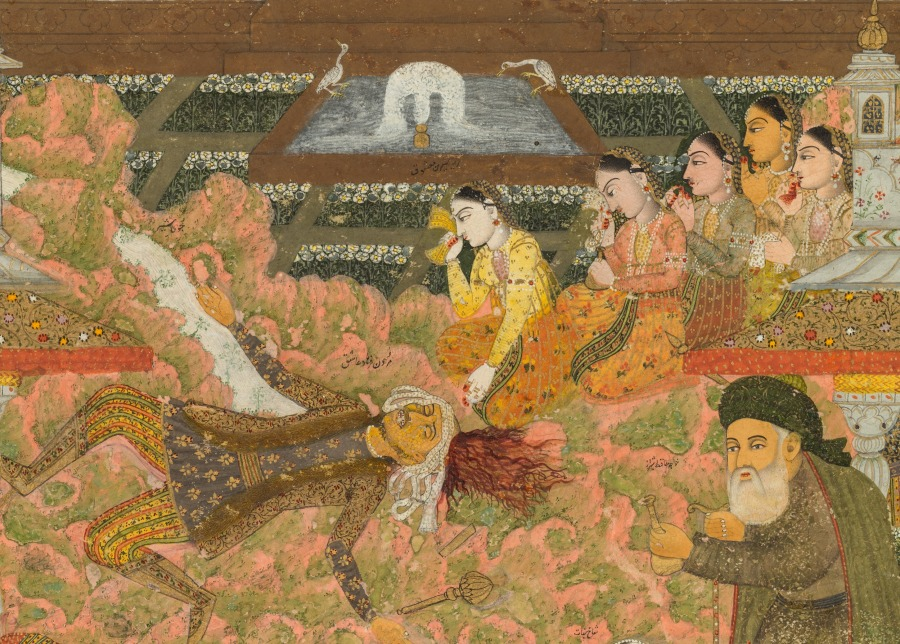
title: Lovers and beloveds: A composite of scenes from Persian, Urdu, and Sanskrit literature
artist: Chitarman II (Indian, c. 1680–с. 1750)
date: c. 1735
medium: Gum tempera and gold on paper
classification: Painting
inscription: Persian inscriptions throughout, in nasta‘liq script: Top left: The celebrated lover Ranjha; Top right, above awning: The notable ladies of the city falling into a swoon having caught sight of Joseph’s beauteous countenance; Top center, on pillar beneath canopy: The celebrated lover Vamiq; On another pillar, behind the woman’s head: The celebrated beloved ‘Azra; Upper left, on pillar: King Nala, the lover; Central figure with halo: The coming from the prison and sitting [in state] of the Lord Joseph the Prophet, with the women of the town cutting the palms of their hands and falling down unconscious; Left of center: [. . . cutting palms . . . wine cups fell from their hands . . . state of wonderment . . .]; Central pavilion at left: Sassi, the beloved the lover [Punnun]; Below central figure of Joseph: The stream of milk Shirin the beloved, weeping The death of Farhad, the lover; Lower right, in front of bearded man: Hafiz of Shiraz; Below his decanter: The stick of candy [referring to the woman with whom, according to popular lore, Hafiz was supposed to have fallen in love as a youth]; Behind the pavilion at right: Bride descending into a grave . . .; On the white railing to the left: Khwaja Bu Ali . . .; Bottom left: Queen Padmavati, the beloved, King Ratnasena, the lover; Bottom right: Majnun, the lover; On page held by Majnun: Say, “He is Allah, who is One, Allah the eternal refuge. He neither begets nor is born, Nor is there to Him any equivalent.” [Qur'an, chapter 112]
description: The figure of Joseph, identified by his halo, sits in the center near the top of this painting of heroes and heroines of ten different Persian, Urdu, and Sanskrit romances. The depicted scene occurs after Joseph has been purchased by Zulaykha in Egypt. Zulaykha, wishing to show him off to her friends and acquaintances, invites them to her home where she supplies oranges and knives. When the women see Joseph, they all are so distracted by his divine beauty that they accidentally cut their hands while peeling their oranges, but remain mesmerized by his appearance. The dramatic scene in the center is from the Persian romance of Khusrau and Shirin, in which Farhad, a stonecutter who loved Shirin, threw himself to his death from a mountaintop after hearing news of Shirin’s death, falsely sent to him from his rival Khusrau. The emaciated Majnun is in the lower right corner. Every vignette has been identified with a tiny Persian inscription.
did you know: Below the bearded poet Hafiz is the woman he loved; her name was Stick of Candy.